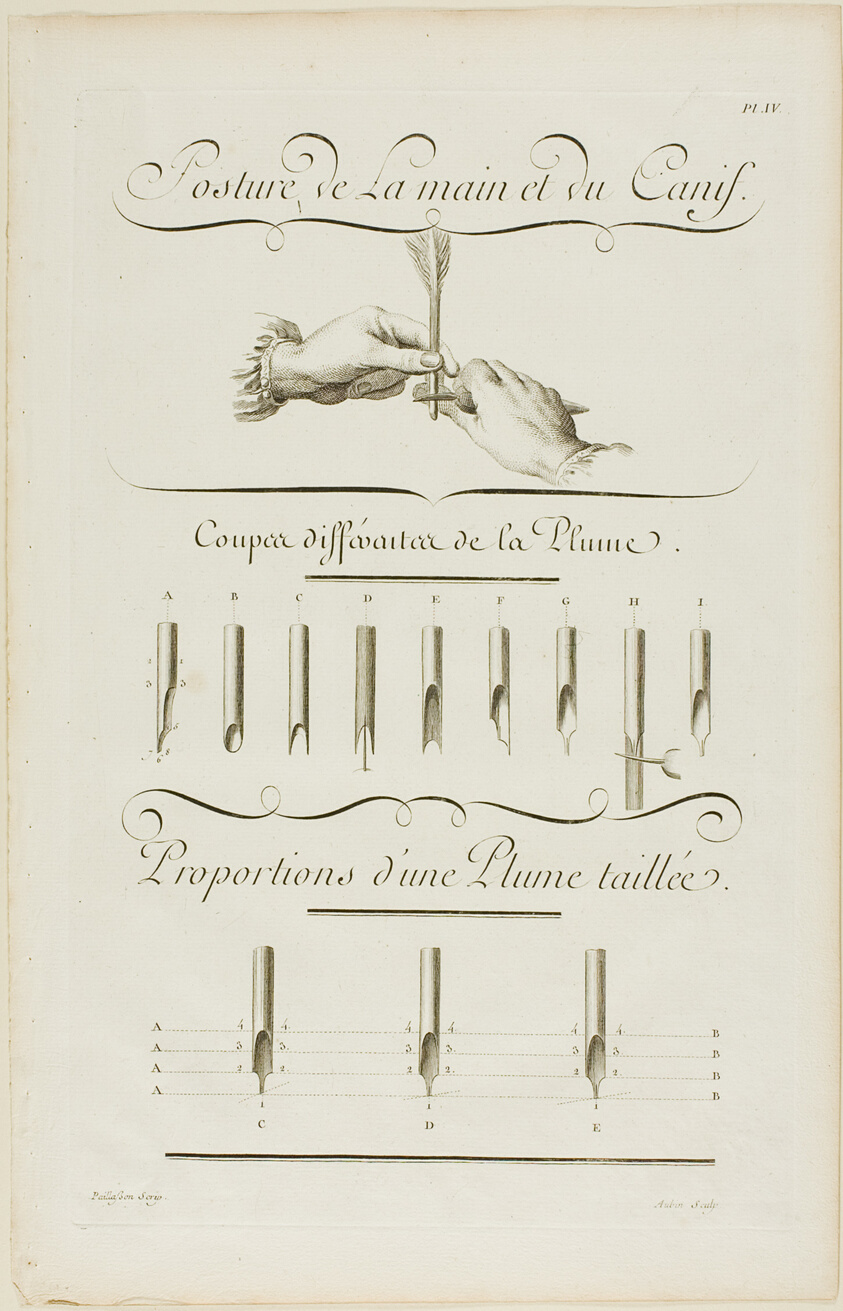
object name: Print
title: Art of Writing, from Encyclopédie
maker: Aubin (French, active 18th century); after Charles Paillasson (French, 1718-1789); published by André le Breton (French, 1708-1779), Michel-Antoine David (French, c. 1707-1769), Laurent Durand (French, 1712-1763), and Antoine-Claude Briasson (French, 1700-1775)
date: 1760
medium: Engraving on cream laid paper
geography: France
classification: engraving; print; prints and drawing